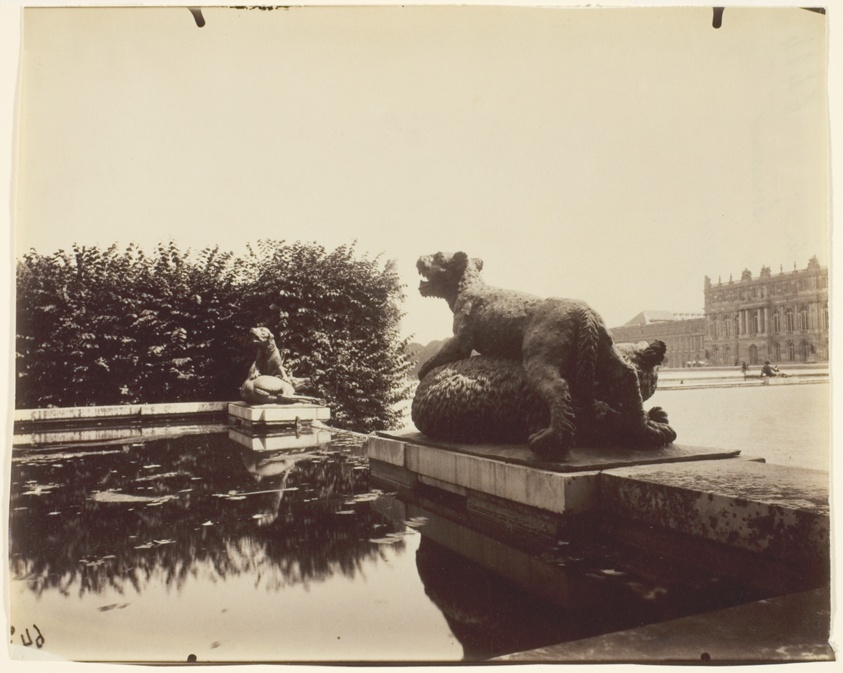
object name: Photograph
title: Versailles, Fontaine du Point du Jour, (Tigre Terrassant un Ours par Houzeau)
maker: Jean-Eugène-Auguste Atget (French, 1857–1927)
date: 1903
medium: Albumen print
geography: France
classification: albumen silver print; photographic process; photography; photograph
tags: Collected by Hugh Edwards